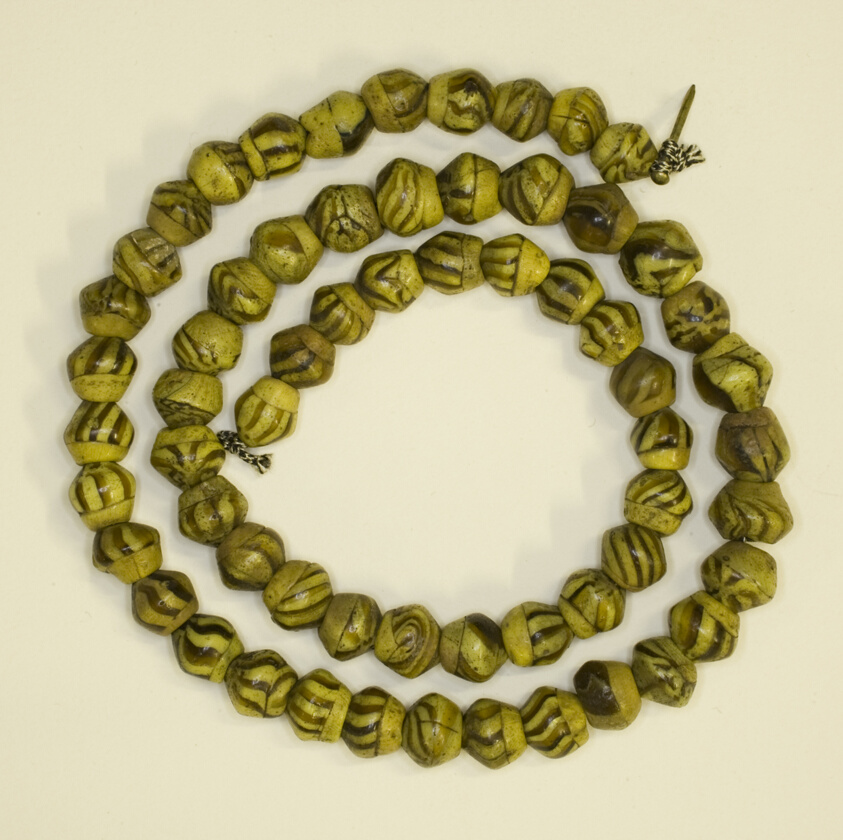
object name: Costume and Accessories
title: String of Beads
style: roman period (egyptian), greco-roman (egyptian), coptic (period)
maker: Roman or Byzantine; Egypt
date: 4th-5th century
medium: Glass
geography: Egypt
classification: stone; bead; ancient art; costume